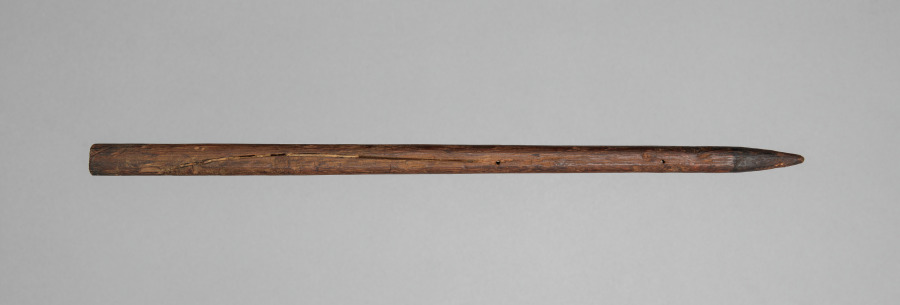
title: Crossbow Bolt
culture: Germany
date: 1500s-1600s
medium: wood, leather, steel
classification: Arms and Armor